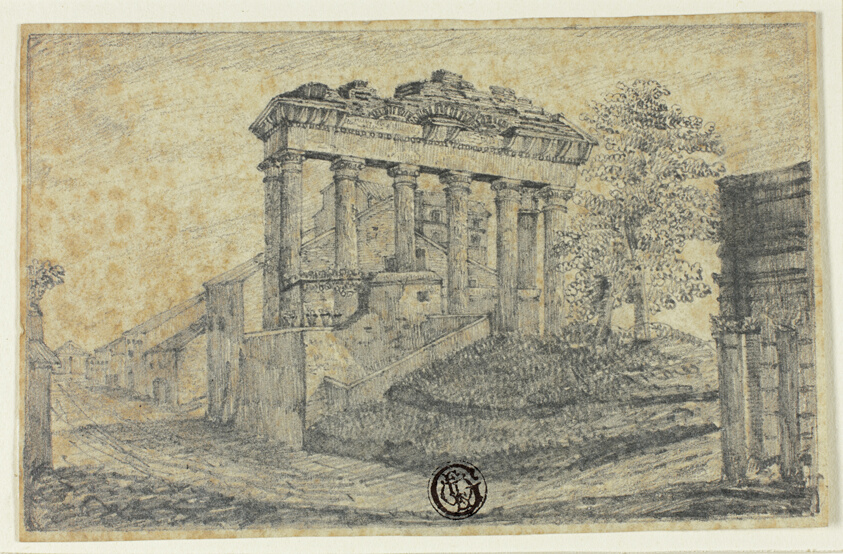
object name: Drawing and Watercolor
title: Temple of Concord at Foot of Campidoglio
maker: Unknown Artist; British, n.d.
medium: Graphite on tan wove paper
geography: United Kingdom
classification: graphite; drawings (visual works); prints and drawing